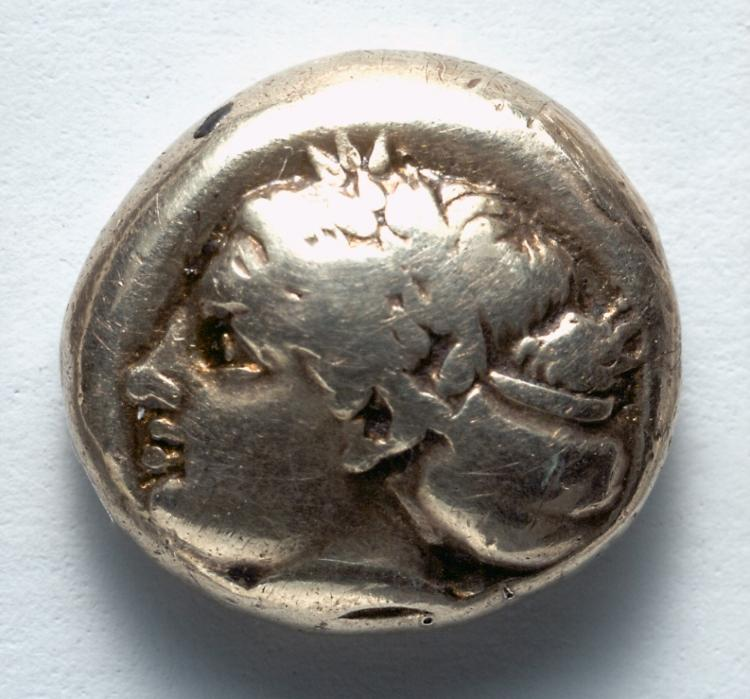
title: Hecte: Female Head (obverse)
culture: Greek, minted at Phokaia (Ionia)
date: 600–350 BCE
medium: electrum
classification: Coins